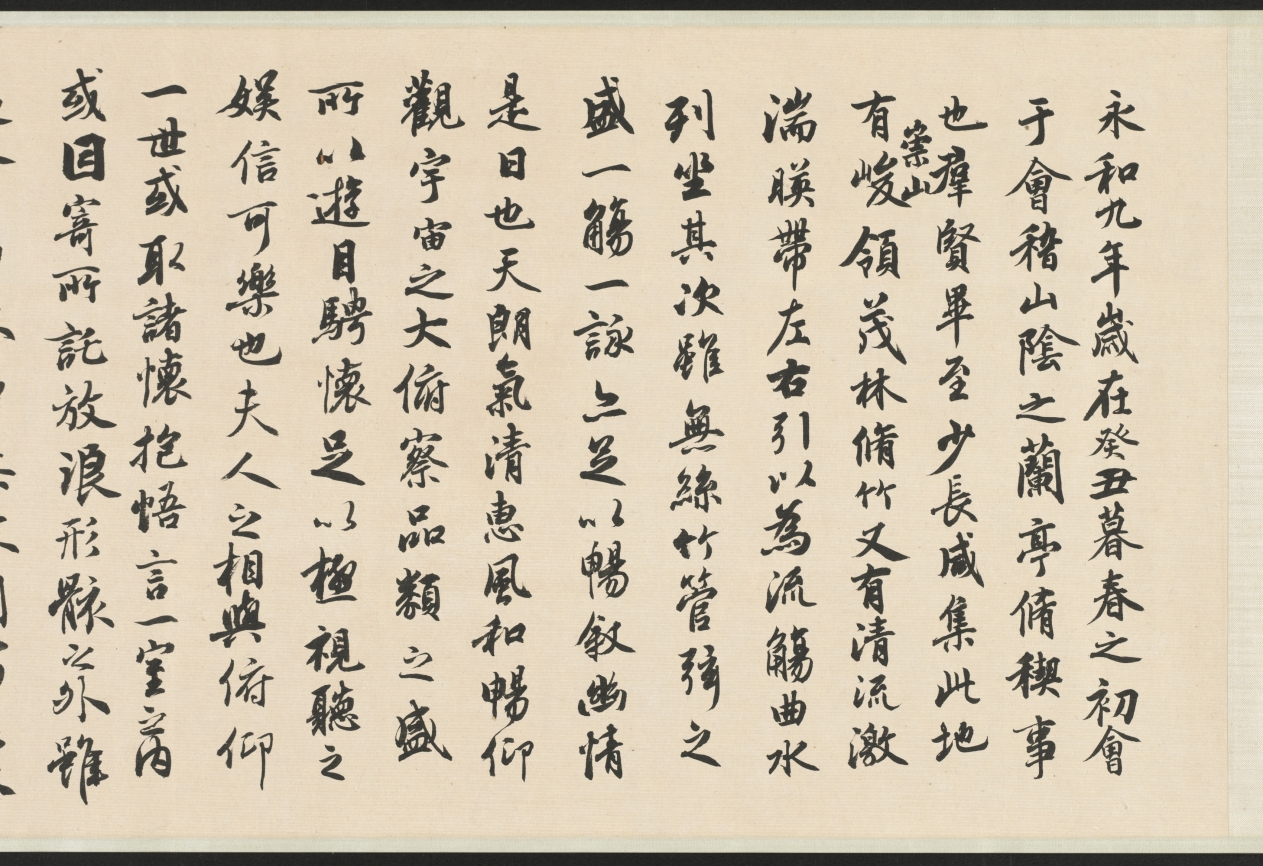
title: Purification at the Orchid Pavilion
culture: China, Qing dynasty (1644-1911)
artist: Fan Yi (Chinese, c. 1615–before 1688)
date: 1671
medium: Handscroll; ink and color on silk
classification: Painting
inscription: Artist's inscription, signature, and 2 seals: Painted by Fan Yi of Zhongfu during the second month of winter of the xinhai year [1671]. [2 seals] Fan Yi zhi yin, Zi yu yi.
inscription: Title on the frontispiece by Monk Yueshan (1629-1709).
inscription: 3 colophons and 13 additional seals: 1 colophon, dated 1707, and 6 seals of Yueshan; 2 colophons and 3 seals of Wong Kwan-Shut (Huang Junshi) 黃君實 (b. 1934); 2 seals of Fu Shen 傅 申 (b. 1937); 2 seals of Tessai Tomioka 富岡鐵齋 (1836-1924).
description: By the 1600s, the historic gathering at Lanting, Zhejiang province, in 353 CE was a common theme in Chinese painting. Originally based on a composition attributed to Li Gonglin (1049– 1106), now lost, Wu school artists revived the theme. Fan Yi, the brother of the artist Fan Qi from Nanjing, used delicate brushwork and luminous colors to depict the spring gathering.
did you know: The gathering’s host is in the Orchid Pavilion at the end of the scroll, representing an episode known as “Wang Xizhi Watching the Geese 王羲之觀鵝圖.”